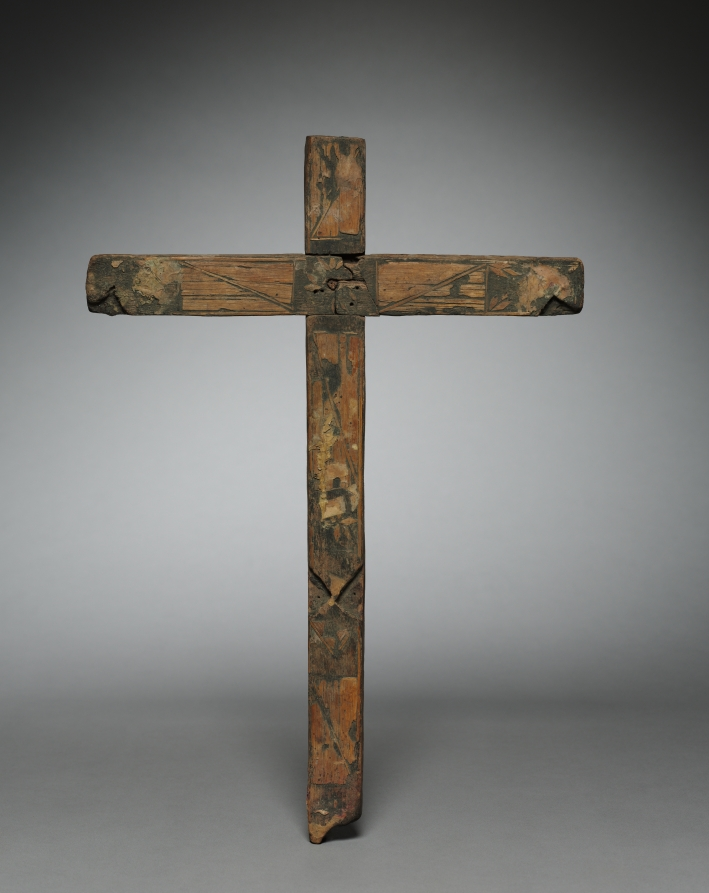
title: Straw Inlay Cross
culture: America, New Mexico, 17th-18th century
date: 1600s-1700s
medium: straw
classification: Miscellaneous